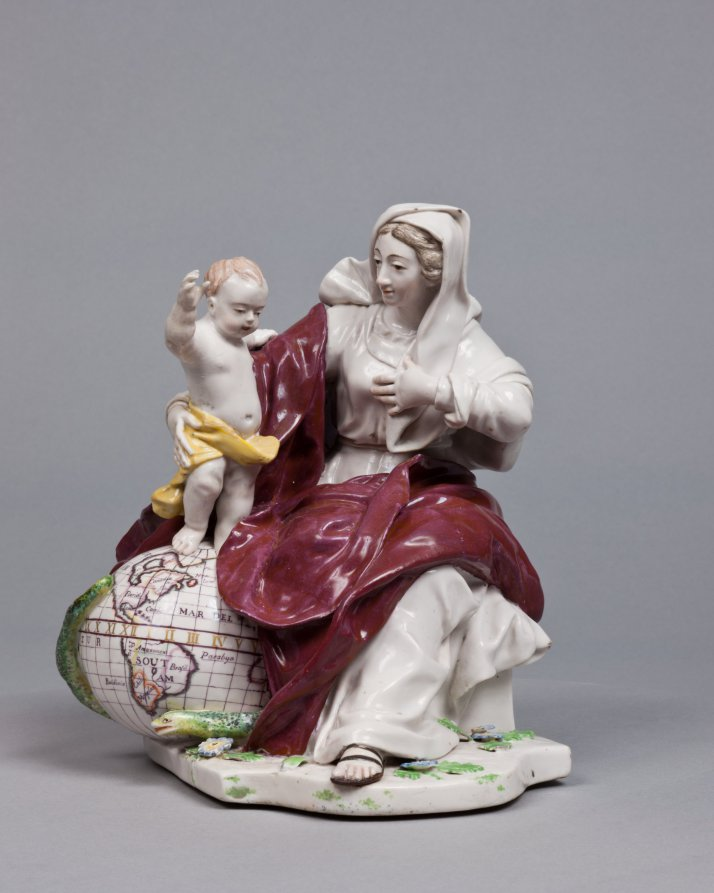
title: Madonna and Child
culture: England, Chelsea, 18th century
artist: Chelsea Porcelain Factory (Britain, London, 1745–84)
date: c. 1755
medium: porcelain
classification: Ceramic